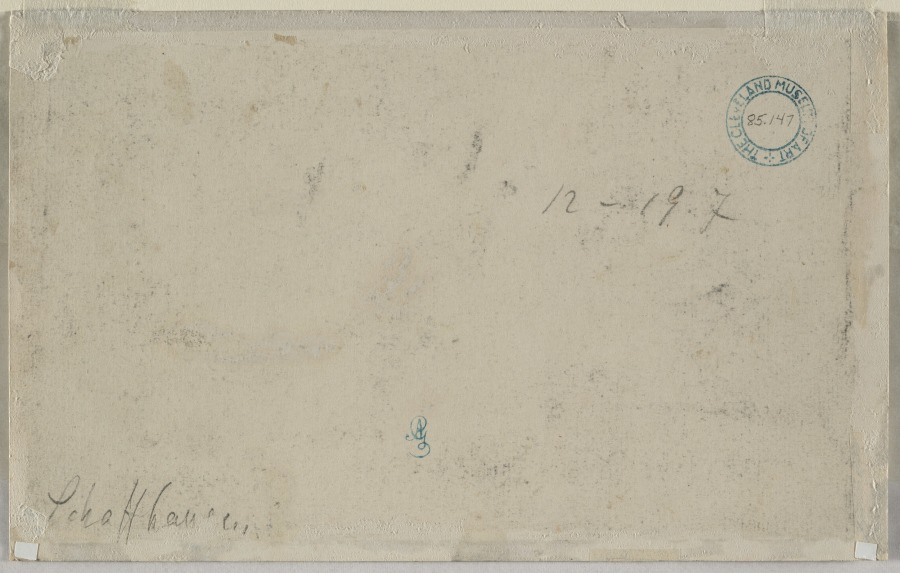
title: Falls of the Rhine at Schaffhausen (Rheinfall von Schaffhausen)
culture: Germany, 19th century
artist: Adolph von Menzel (German, 1815–1905)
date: 1885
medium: graphite, with stumping (traces of white paint, along left edge, unrelated to composition)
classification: Drawing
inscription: signed, lower left, in graphite: A M. 85 [line over 85] ; verso, upper right, in graphite(?): 12-197 ; by artist(?), lower left, in graphite: Schaffhausen [partially skinned]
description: Menzel was one of the most celebrated and prolific painters in Germany during the 19th century. A meticulous draftsman, he executed detailed drawings in preparation for each of his paintings. Thousands of the artist’s notebook studies have survived. Many of them were studies of heads, half-figures, and landscape vignettes to be incorporated into his paintings. This sheet depicting a waterfall and bridge shrouded in mist is an example of one of Menzel’s exquisite graphite studies.